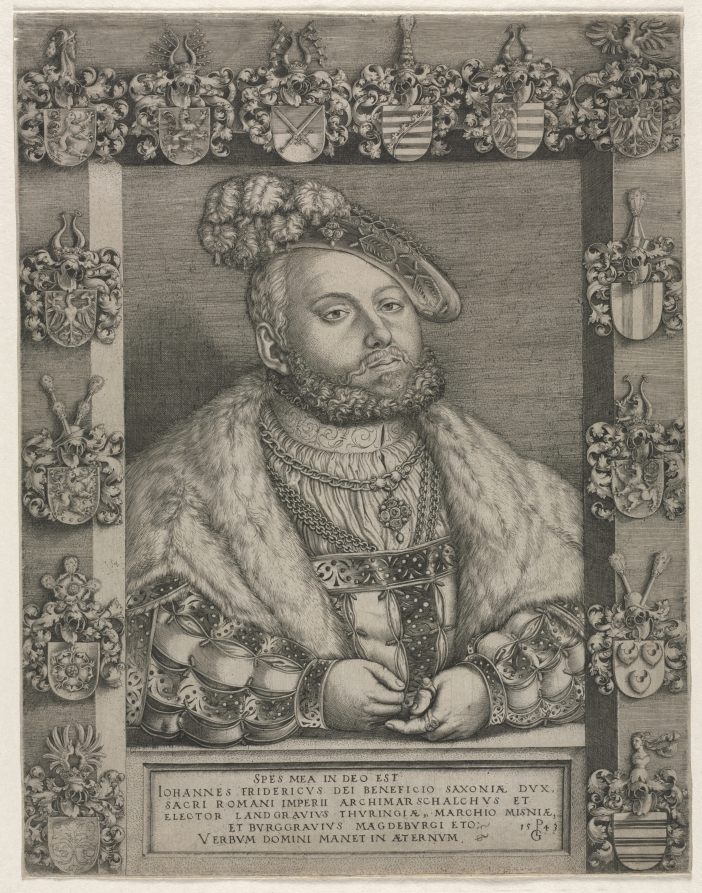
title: Portrait of John Frederick I, "The Magnanimous," Elector of Saxony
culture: Germany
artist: Georg Pencz (German, c. 1500–1550)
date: 1543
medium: engraving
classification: Print